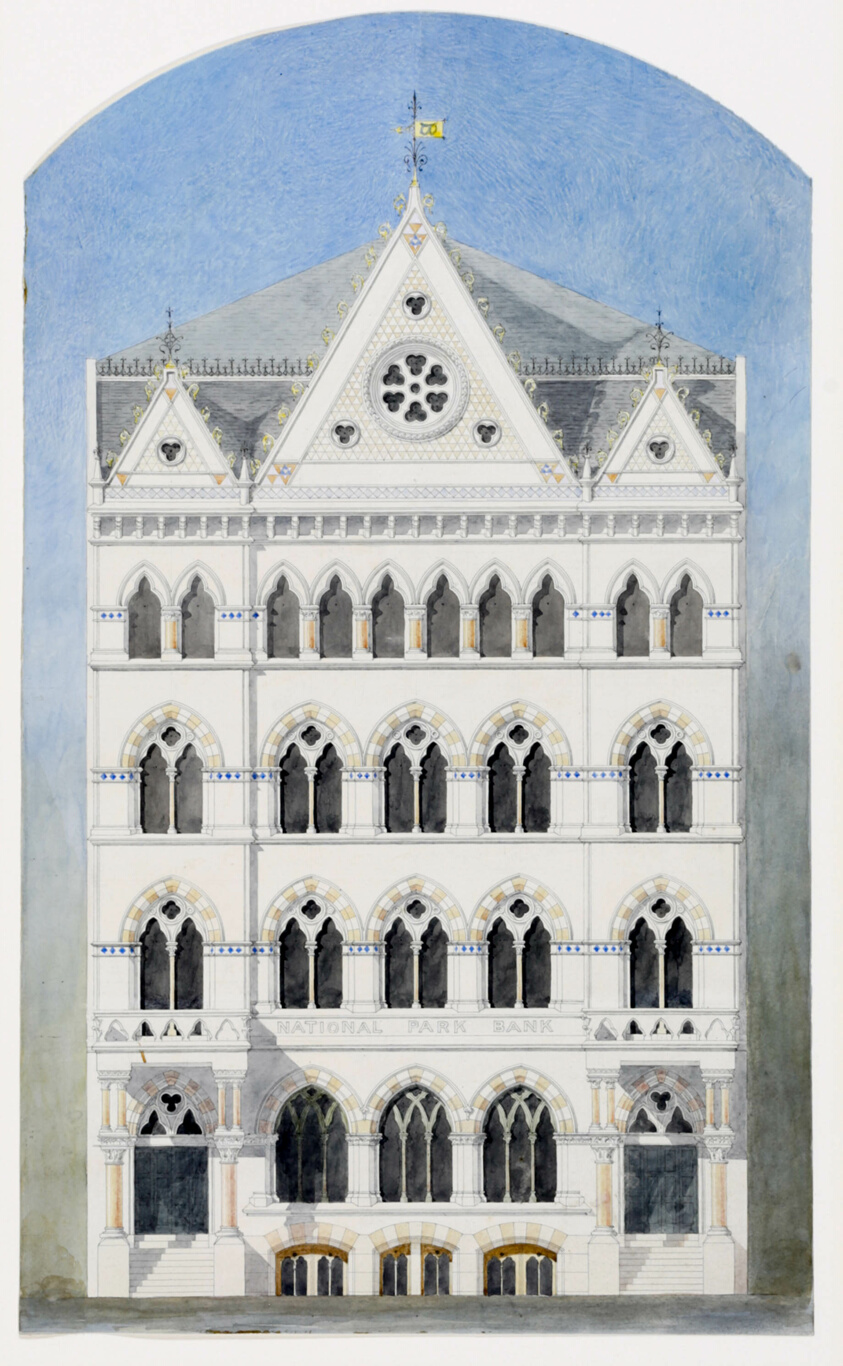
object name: Architectural Drawing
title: National Park Bank, New York City, New York, Competition Design Drawing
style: 19th century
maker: Peter Bonnett Wight (American, 1838–1925)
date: c. 1866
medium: Ink and watercolor on paper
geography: New York City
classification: presentation drawing; architectural drawing; architecture; design drawing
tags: buildings, city scenes, urban planning, design drawing, New York City, New York